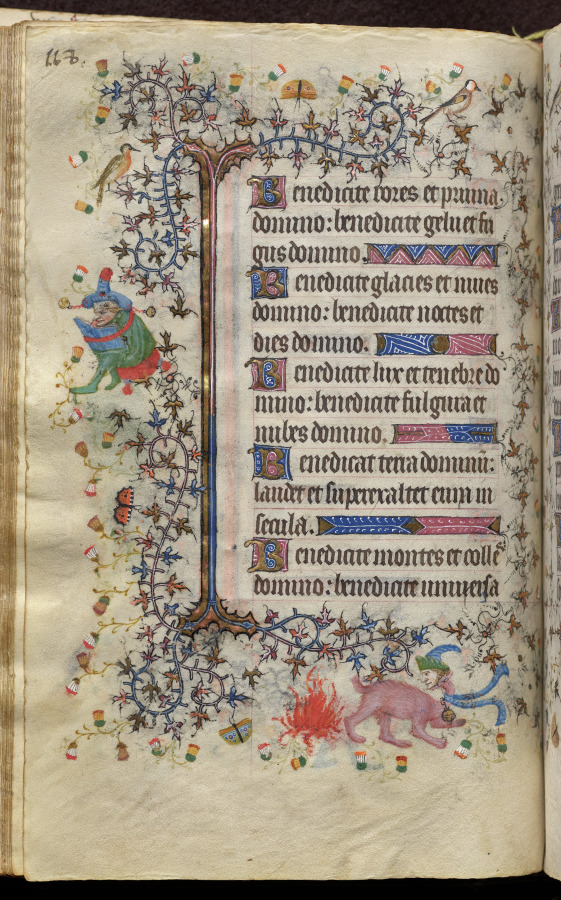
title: Hours of Charles the Noble, King of Navarre (1361-1425): fol. 59v, Text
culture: France, Paris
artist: Master of the Brussels Initials and Associates (French)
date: c. 1405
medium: ink, tempera, and gold on vellum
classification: Bound Volume